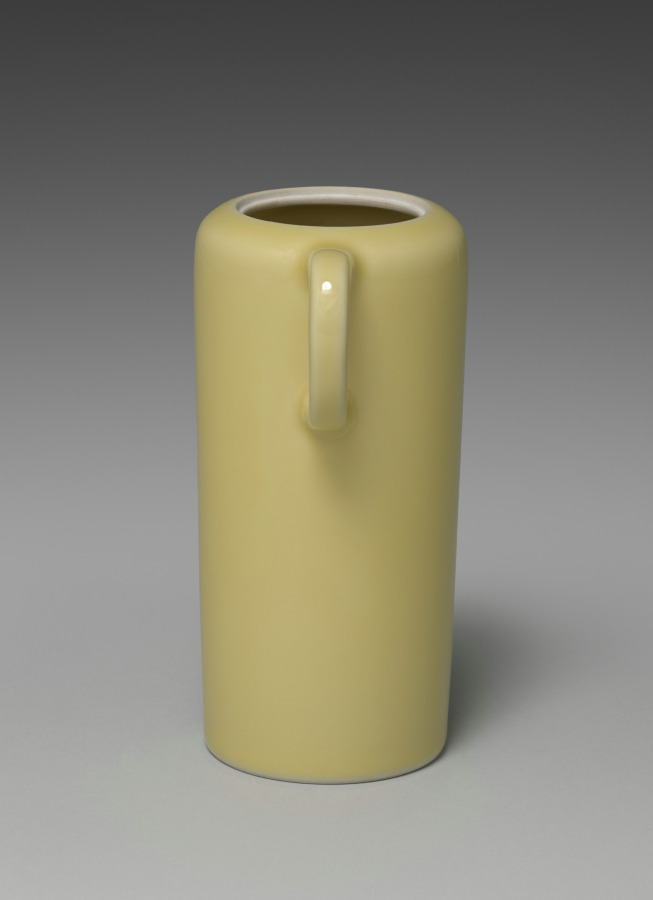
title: Sake Pourer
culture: Japan, Taishō period (1912–26) or Shōwa period (1926–89)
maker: Seifū Yohei IV (Japanese, 1872–1951)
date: 1914–46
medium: Porcelain with yellow glaze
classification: Ceramic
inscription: 清風造 。 【印】 清風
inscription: 成山清風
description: Like his father, Yohei IV also produced works with red or yellow monochrome glazes. His yellow-glazed works include this pair of sake pourers, a set of five drinking cups CMA 2022.217, and a sweets bowl molded into the shape of a chrysanthemum CMA 2022.218.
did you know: The lid's handle is made of bamboo.